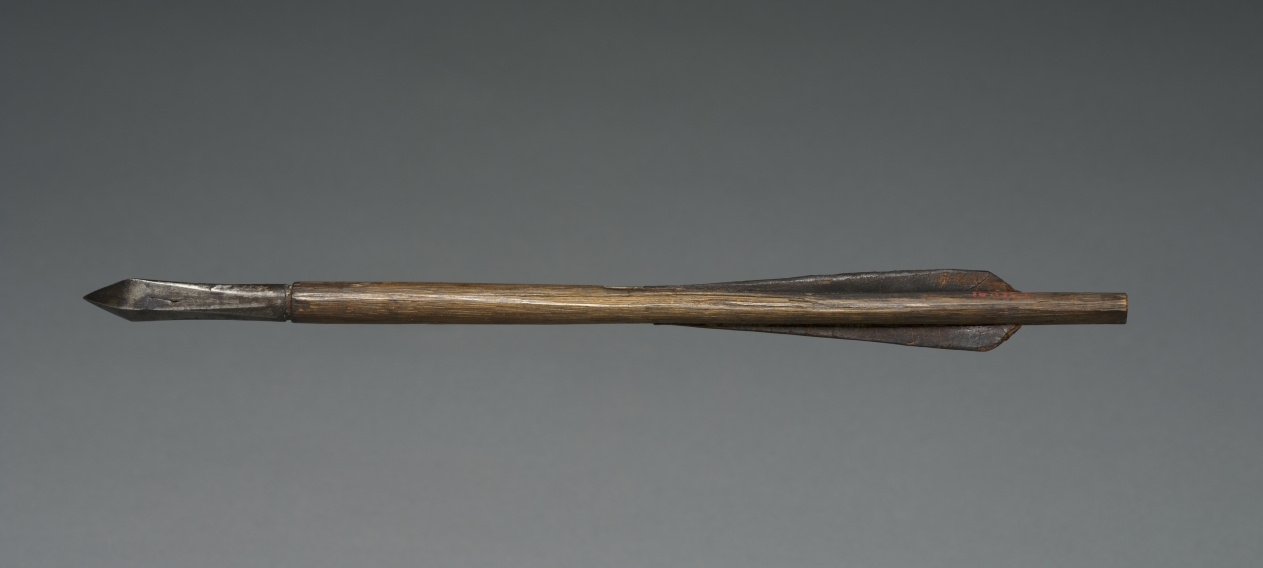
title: Crossbow Bolt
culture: Germany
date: 1500s–1600s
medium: wood, leather, steel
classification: Arms and Armor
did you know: Bolts with leather feathering were used mainly in the Tyrolean area, which includes northern Italy and western Austria.